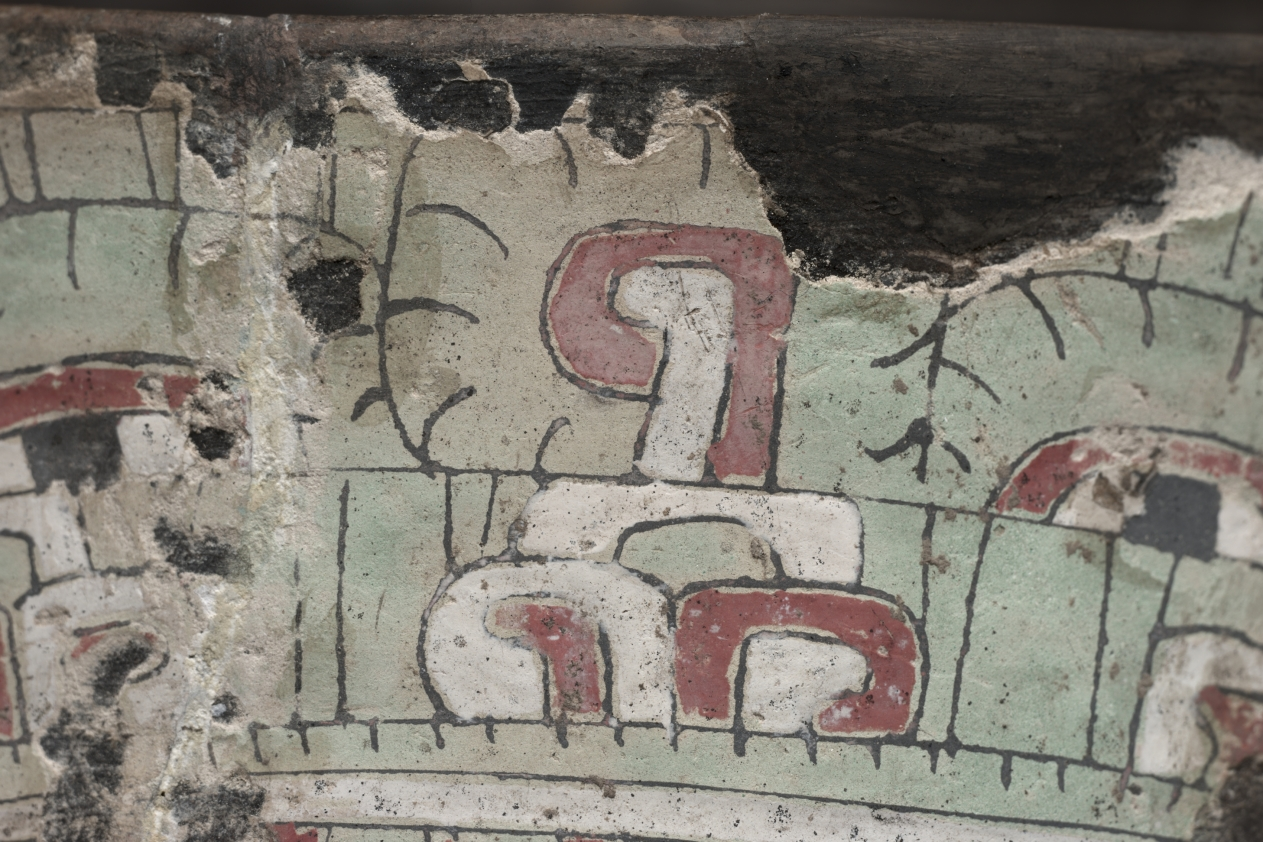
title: Vessel with Butterfly Headdress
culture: Central Mexico, Teotihuacán, Classic period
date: 1–550 CE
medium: ceramic, stucco, pigment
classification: Ceramic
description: The headdress shown on this vessel combines a serpent's mouth with a butterfly's proboscis (feeding tube), which curls between the eyes. The butterfly often appears in the headdress of the Great Goddess, an extremely important Teotihuacán deity. Stucco (paper-thin, painted plaster) is fragile and usually does not survive well; the stucco of the basin in this case has been repaired.